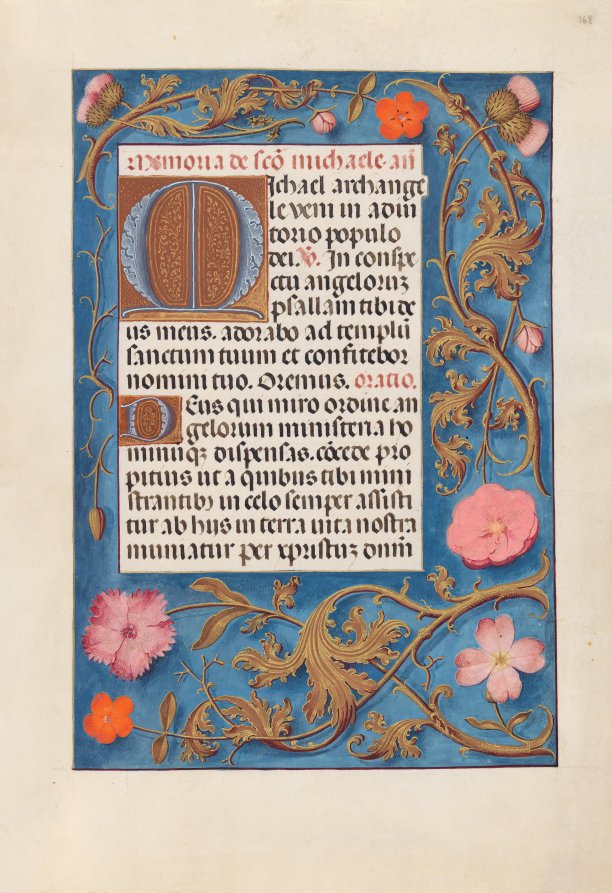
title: Hours of Queen Isabella the Catholic, Queen of Spain: Fol. 168r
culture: Flanders, Ghent and Bruges, late 15th century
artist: Master of the First Prayerbook of Maximillian (Flemish, c. 1444–1519)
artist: and Associates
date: c. 1500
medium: ink, tempera, and gold on vellum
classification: Bound Volume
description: This manuscript was illuminated by a circle of at least five highly organized manuscript painters active in the Flemish cities of Ghent and Bruges. The principal illuminator was Alexander Bening, who painted the majority of the book's miniatures. Manuscripts produced by this circle of artists are renowned for the decoration of their borders, which typically feature a rich variety of realistically-painted flowers, birds, and butterflies. This prayer book, called a book of hours, was intended not for a cleric, but for the private devotions of a lay person-in this case, Isabella the Catholic, Queen of Spain (1451-1504). Isabella's coat of arms embellishes the book's frontispiece. It is unlikely that the book was commissioned by the Queen herself; rather, she probably received it as a diplomatic gift from someone courting her patronage, perhaps Cardinal Francisco Jimenez de Cisneros. A Franciscan friar, Jimenez was dependent upon Isabella for his advancement, first to the post of Queen's confessor in 1492, and then to Archbishop of Toledo in 1495.